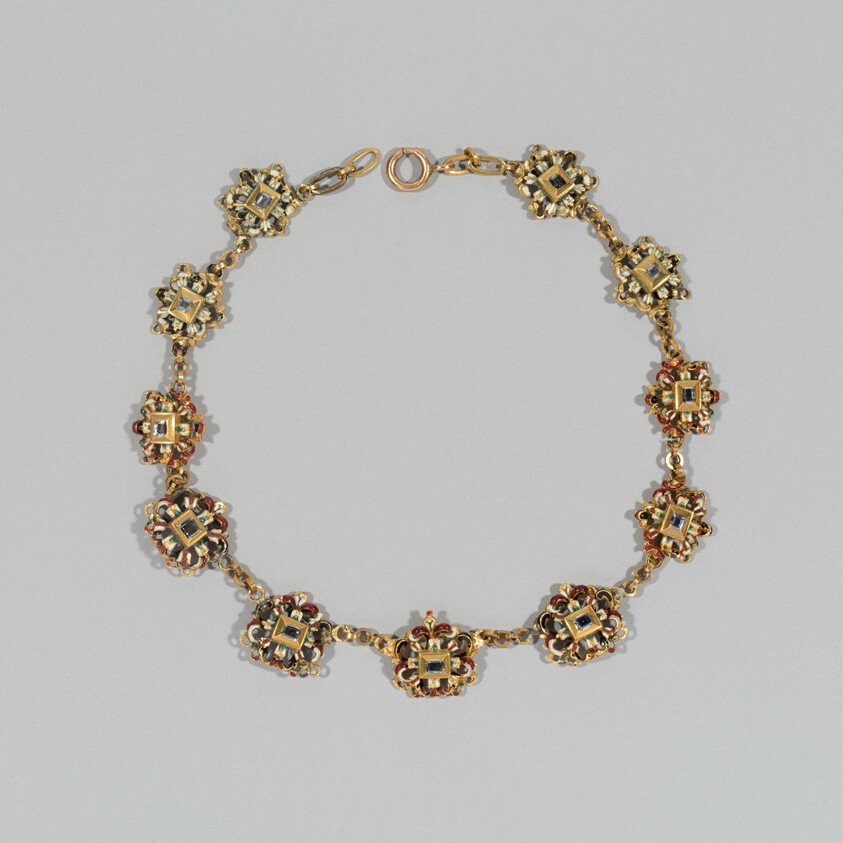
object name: Costume and Accessories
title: Eleven Links Mounted as a Necklace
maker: South German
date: c. 1575-c. 1625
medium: Gold, enamel, and diamonds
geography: Southern Germany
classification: jewelry; european decorative arts; costume